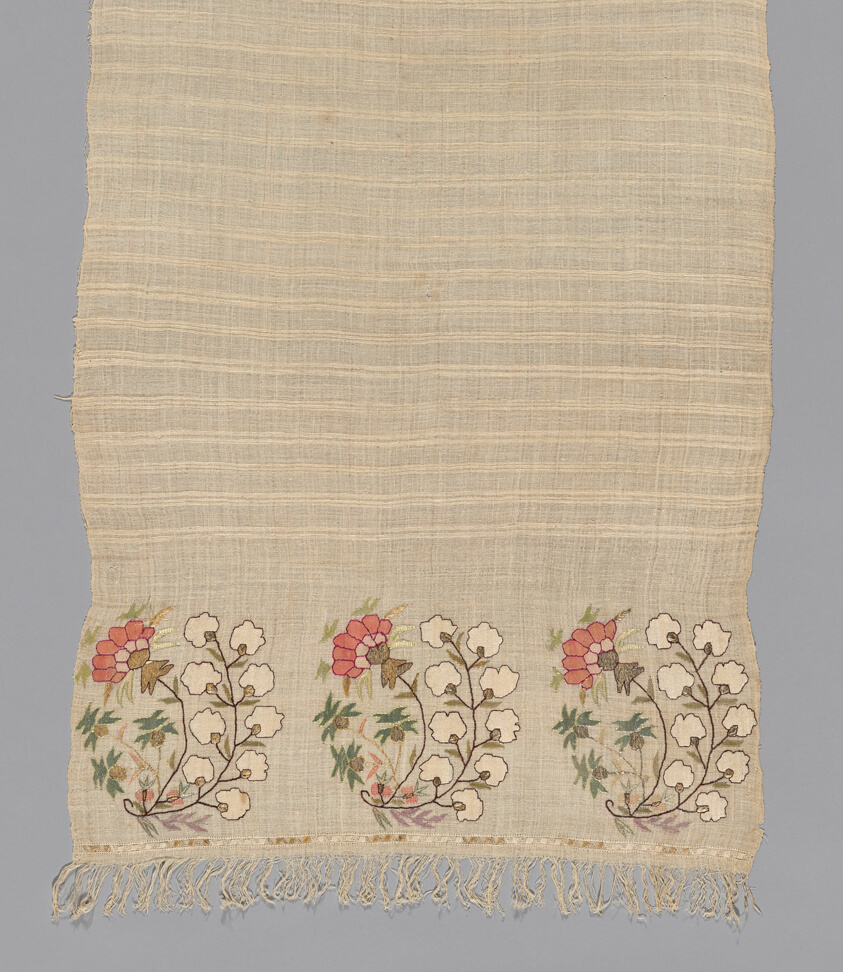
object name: Textile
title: Towel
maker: Turkey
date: 19th century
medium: Linen and cotton, plain weave; embroidered with silk, linen and gilt-metal-strip-wrapped silk in darning, fishbone, hem, overcast, double running, twined double running and satin stitches; main warp fringe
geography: Turkey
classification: textile; weaving; needlework (visual works)